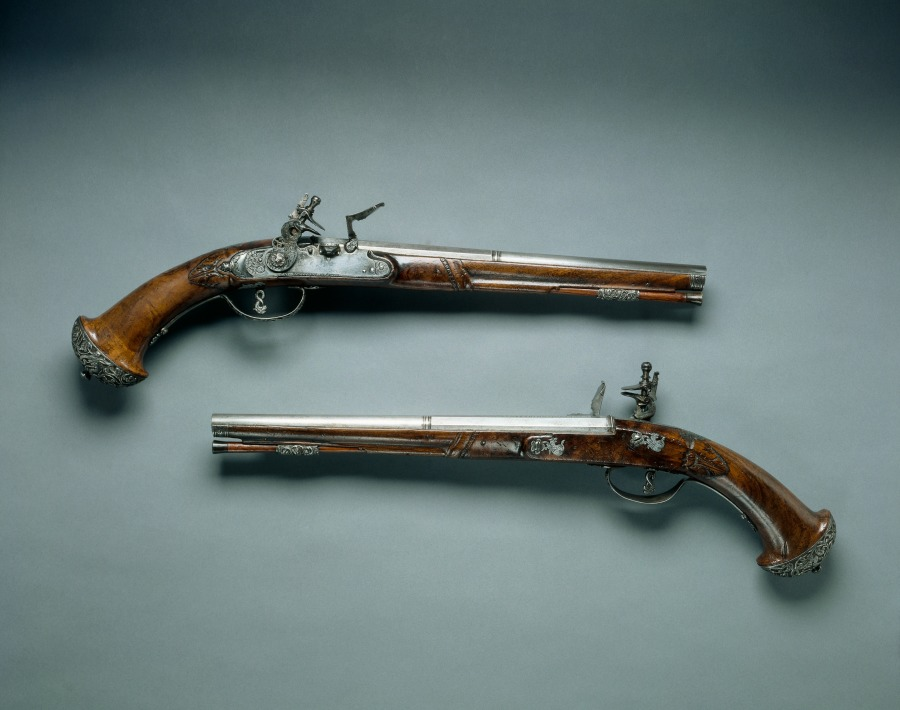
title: Pair of Flintlock Pistols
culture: Italy, Brescia, late 17th century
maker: Gio Borgognone (Italian)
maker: Lazarino Cominazzo (Italian)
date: c. 1690–1700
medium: steel, chiseled steel with walnut stock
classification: Arms and Armor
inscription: barrel signed: Lazarino Cominazzo; lockplates signed: Gio Borgognone in Bresia